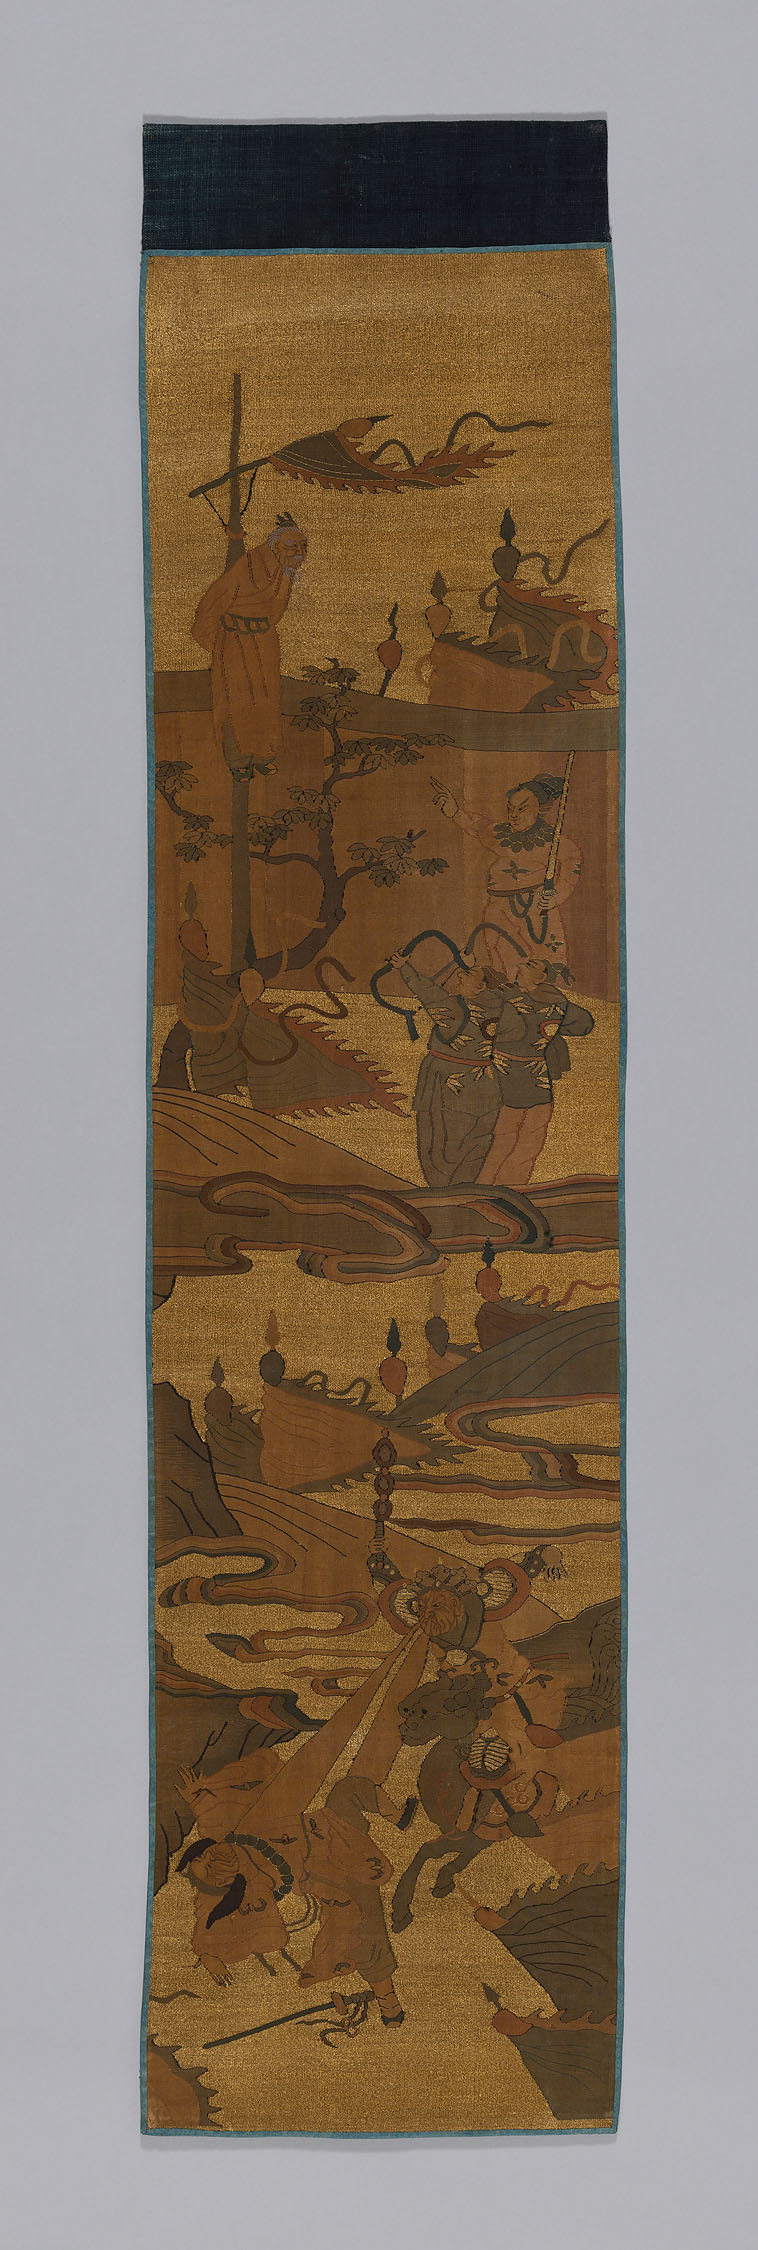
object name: Textile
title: Tapestries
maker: China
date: Qing Dynasty (1644–1912), 19th century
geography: China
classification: textile; weaving